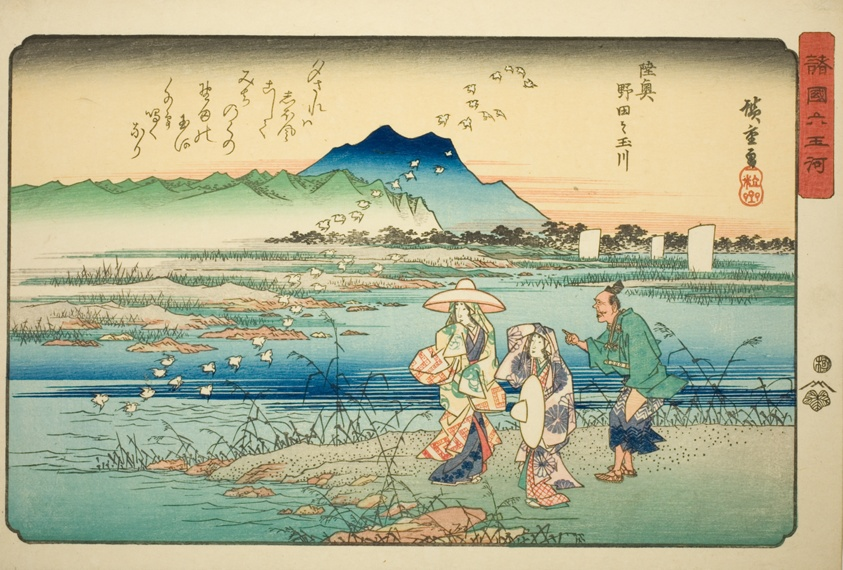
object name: Print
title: The Noda Jewel River in Mutsu Province (Mutsu Noda no Tamagawa), from the series "Six Jewel Rivers in Various Provinces (Shokoku Mu Tamagawa)"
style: Japanese (culture or style)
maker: Utagawa Hiroshige 歌川 広重; Japanese, 1797-1858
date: c. 1835/37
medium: Color woodblock print; oban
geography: Japan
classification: woodblock print; print; asian art